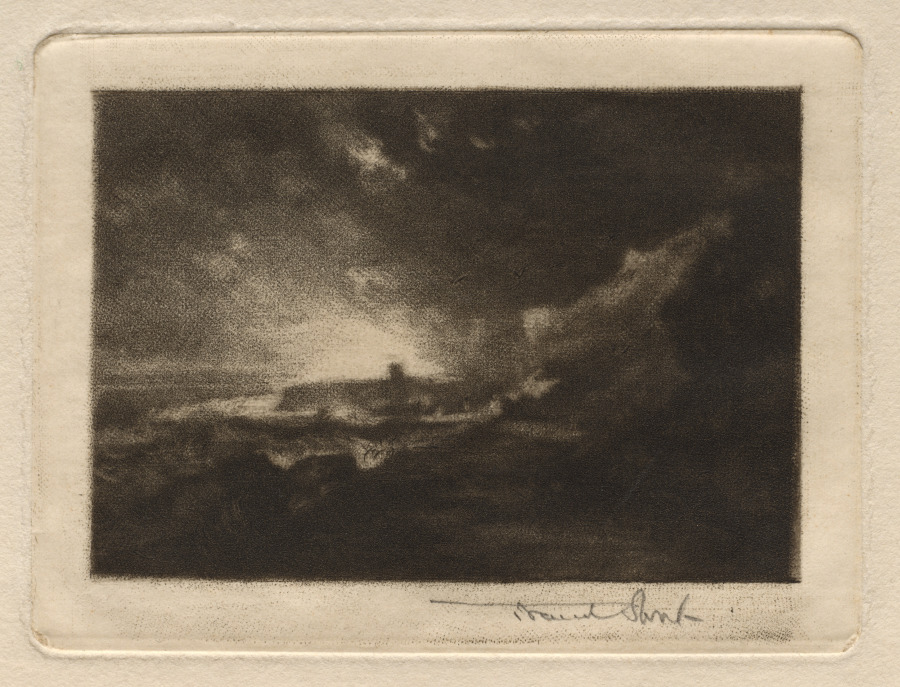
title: Scarborough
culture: England, 19th century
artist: Frank Short (British, 1857–1945)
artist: after J.B. Carter (British)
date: 1884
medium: mezzotint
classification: Print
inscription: Below image, in graphite: Frank Short; lower right corner: Scarborough